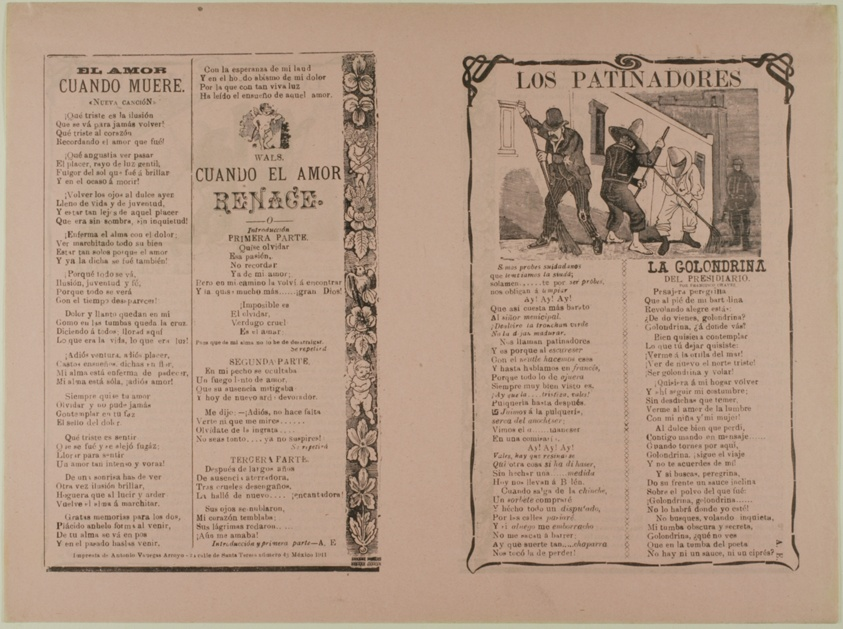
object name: Print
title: Los patinadores (The Streetcleaners)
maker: José Guadalupe Posada (Mexican, 1852-1913)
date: 1890/99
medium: Relief print on paper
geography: Mexico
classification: relief print; print; prints and drawing